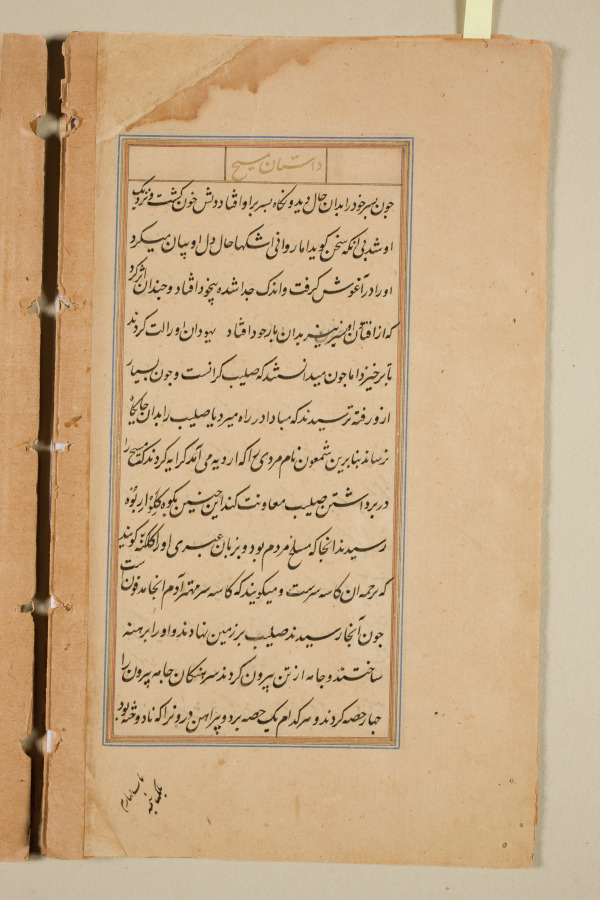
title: Text page from a Mirror of Holiness (Mir’at al-quds) of Father Jerome Xavier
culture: Mughal India, Allahabad, made for Prince Salim (1569–1627)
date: 1602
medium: Ink and gold on paper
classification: Manuscript